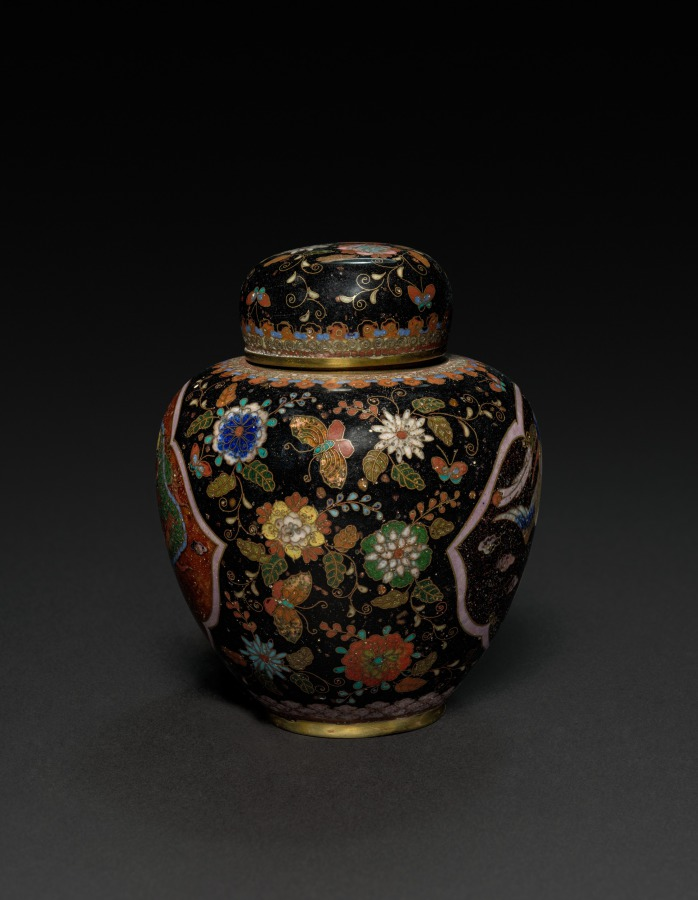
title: Ginger Jar with Phoenix and Dragon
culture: Japan, Meiji period (1868–1912) or Taishō period (1912–26)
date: early 1900s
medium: cloisonne enamel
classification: Enamel